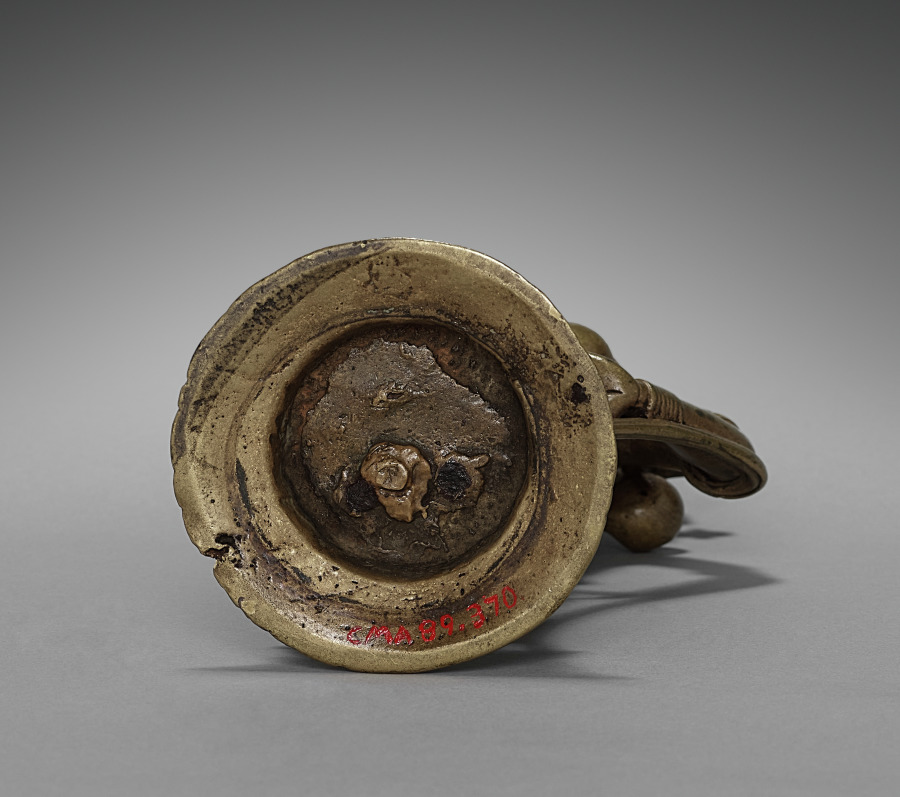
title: Standing Devi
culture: India, Ladakh, 12th century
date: 1100s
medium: brass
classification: Sculpture